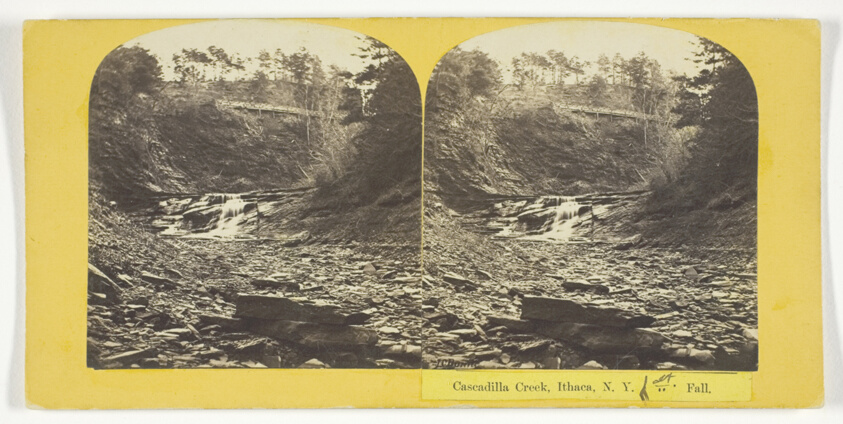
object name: Photograph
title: Cascadilla Creek, Ithaca, N.Y. 1st Fall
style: 19th century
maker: J. C. Burritt; American, active 1860s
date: 1860/65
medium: Albumen print, stereo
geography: Ithaca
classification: photography; photograph; albumen silver print; stereograph (albumen)